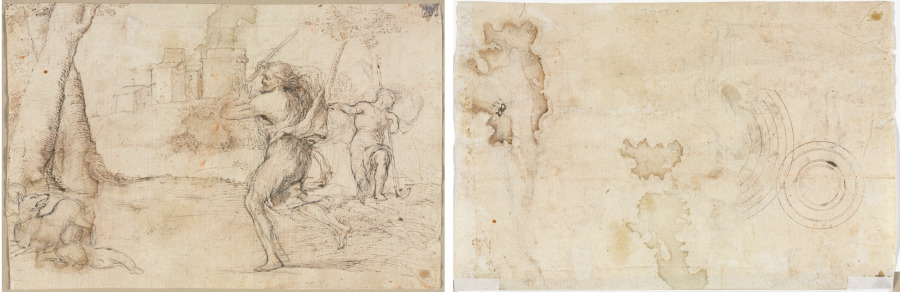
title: Romulus and Remus Found by Faustulus (recto) Concentric Circles (verso)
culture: Italy, 16th century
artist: Romanino (Italian, 1484/87–1562)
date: c. 1535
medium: pen and brown ink, with point of brush and brown wash over black chalk (traces of red chalk and purple wash unrelated to composition)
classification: Drawing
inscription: upper right, in black ink: [2?]00